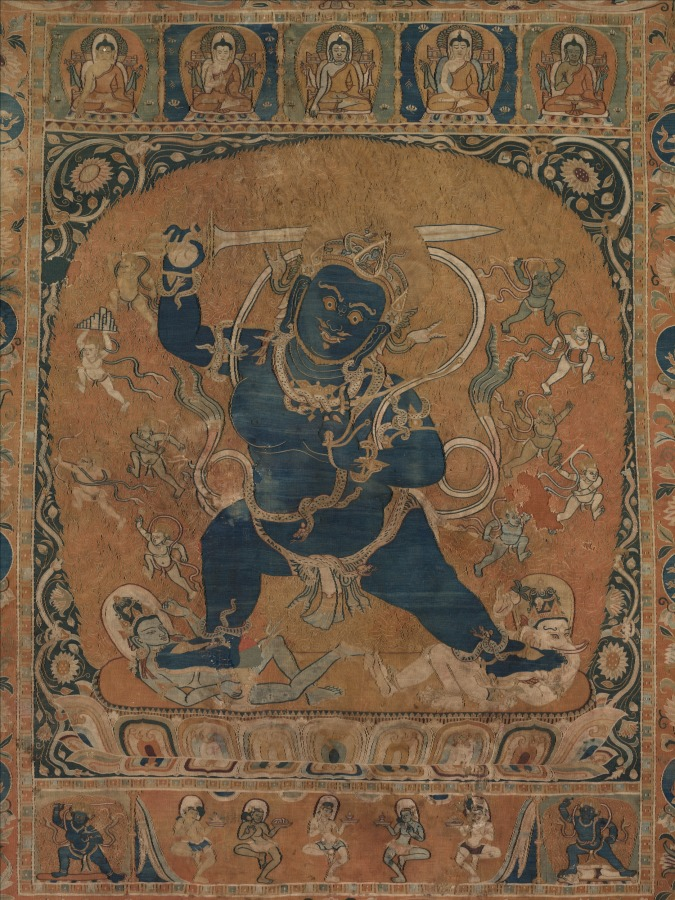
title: Achala, King of the Wrathful Ones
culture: China, Zhejiang Province, probably Hangzhou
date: early 1200s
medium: Thangka, silk tapestry with pearls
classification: Textile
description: The powerful blue body of Achala, meaning “immovable,” dominates the composition. He holds a sword to cut through ignorance and a noose for catching illusions that plague the path to enlightenment. Small personifications of furious destroyers of illusion (maya) emanate from him on either side, each with his own weapon. This image expresses what advanced practitioners would visualize in meditation rituals, as explained in Buddhist texts called tantras. Woven with a sophistication matched only by products of the Hangzhou looms, this devotional tapestry made its way to Khara-Khoto, capital of the Tangut Empire located in present-day Mongolia and Central Asia, where tantric Buddhism was prevalent.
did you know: The elephant-headed figure under his left foot is a demonic divinity, a yaksha, who creates obstacles to enlightenment.